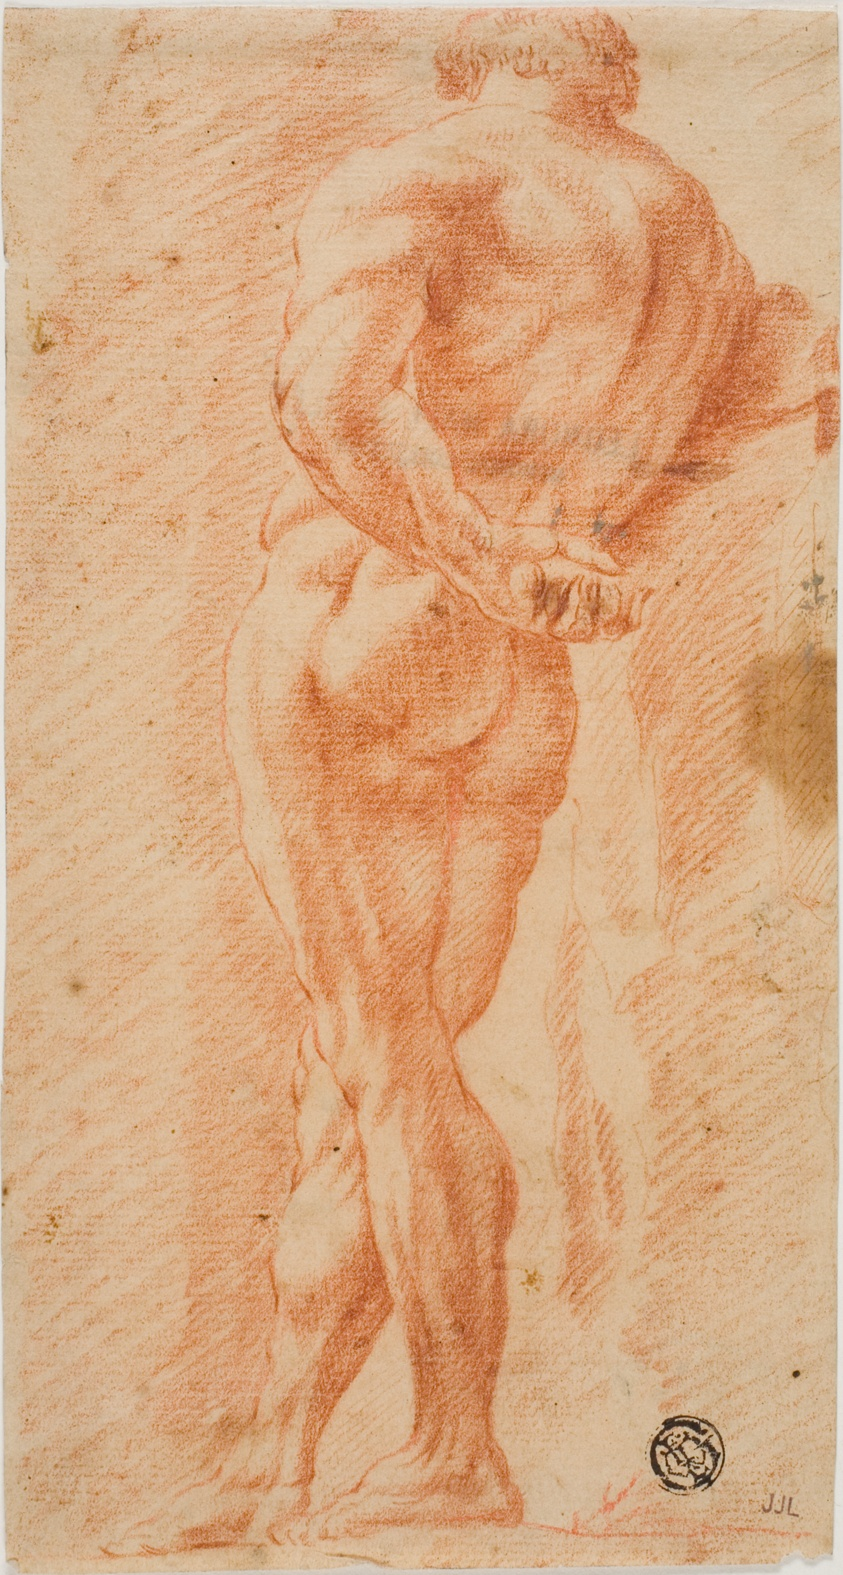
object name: Drawing and Watercolor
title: Farnese Hercules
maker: Unknown Artist; European, 1700-1799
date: 1700-1799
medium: Red chalk on tan laid paper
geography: Europe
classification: chalk; drawings (visual works); prints and drawing